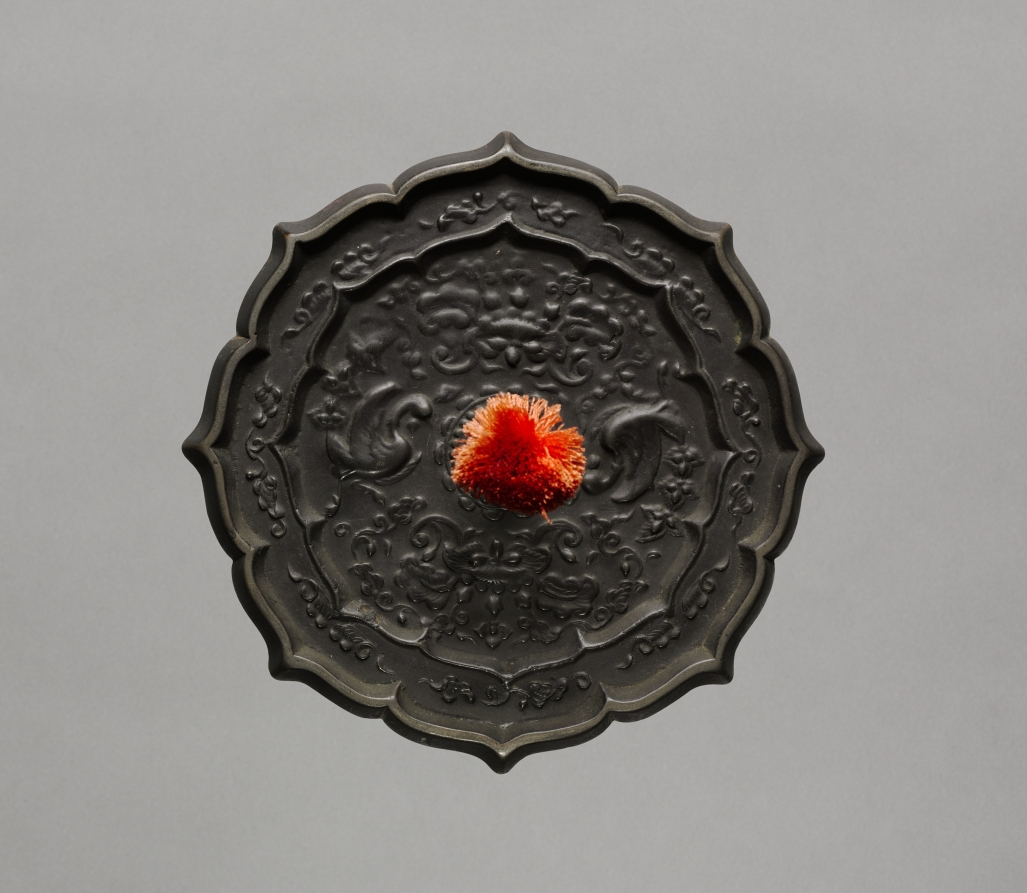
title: Mirror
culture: Japan, Kamakura period (1185–1333)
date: 1185–1333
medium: bronze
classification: Metalwork